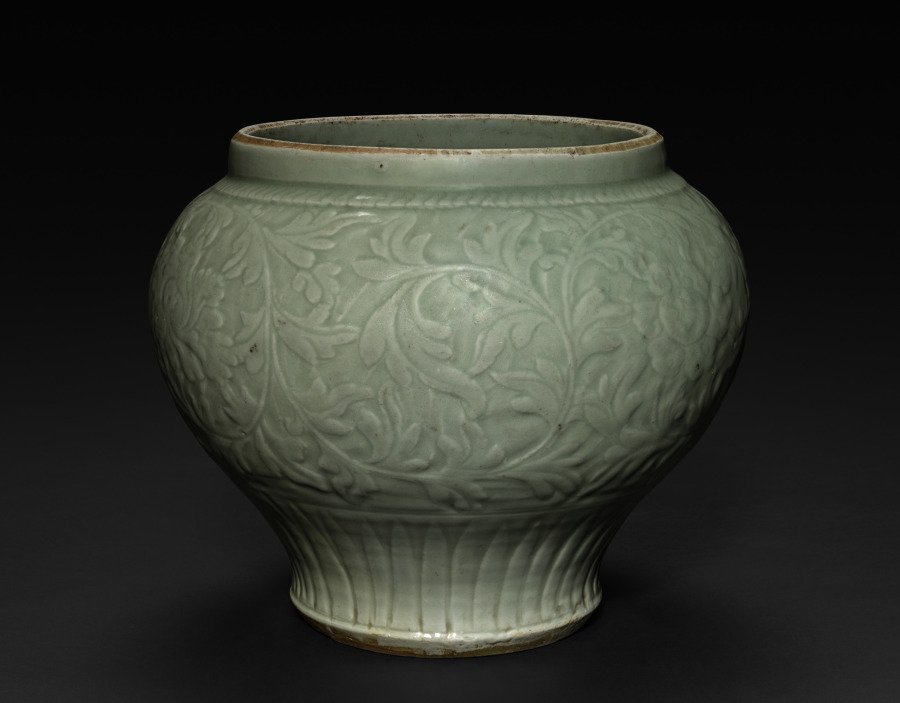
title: Jar: Celadon Ware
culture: China, Ming dynasty (1368–1644)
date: 1368–1644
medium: stoneware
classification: Ceramic